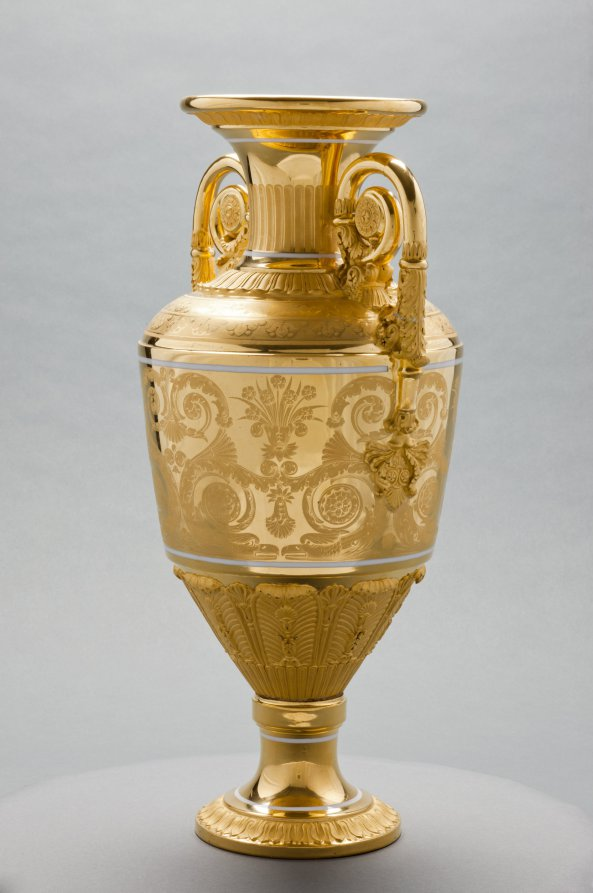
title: Vase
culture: Russia, St. Petersburg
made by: St. Petersburg Imperial Porcelain Factory (Russian)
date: c. 1820–1830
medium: gilt porcelain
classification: Ceramic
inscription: inscribed: "Moreau" in gold near lip.